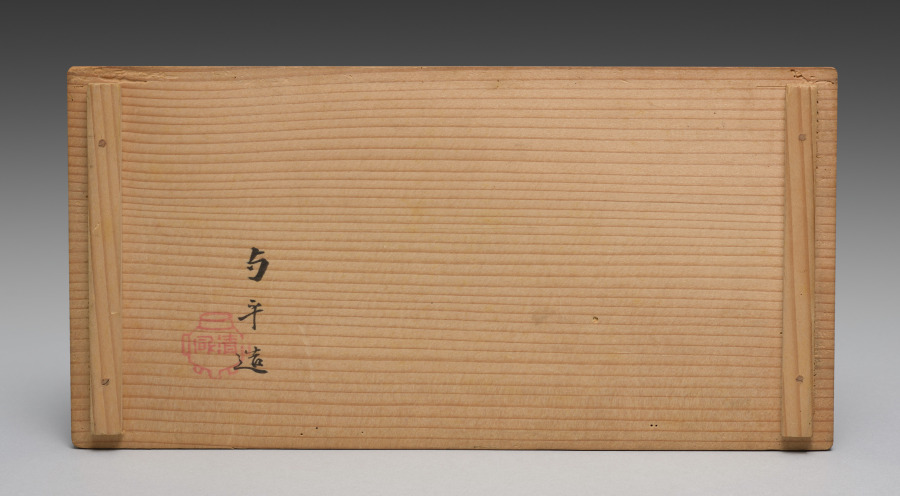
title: Dining Set with Plum Blossoms and Cracked-Ice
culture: Japan, Edo period (1615–1868) to Meiji period (1868–1912)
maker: Seifū Yohei II (Japanese, 1844–1878)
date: 1875–78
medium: Porcelain with molded designs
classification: Ceramic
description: Each item in this set has a delicate low-relief design of flowering plum branches over scattered, intersecting lines meant to resemble the cracked-ice surface of a frozen body of water and is signed on the base in gold pigment. While Yohei II produced many fine works in underglaze blue, like those produced by Kiyomizu Shichibei, he also made works in quite different styles later in his career, from the early 1870 s. In 1873, he was appointed purveyor to the Industrial Center of Kyoto Prefecture, a designation associated with Kyoto’s efforts to reach an international market through the port of Kobe; and from 1875 until his death, he was involved in national-level projects to present Japanese ceramics across the world. It was during this period that Yohei III was apprenticed to Yohei II, and it has been suggested that this set may in fact be an early example of Yohei III’s work, which he signed with his teacher’s name. Decorated with flowers resembling Japanese textile motifs, the set calls to mind the design of Yohei II’s pair of vases with plum blossoms in the Victoria and Albert Museum. Here, the elaborate trees created for a formal public exhibition setting have been translated into the approachable blossoms of the genteel domestic environment. While the designs are consistent across the pieces, each raised flower petal and pistil and each incised line in the ice was done by hand, so the cups, bowls, and dishes are similar yet unique. The bottoms of two boxes once identified the set’s owner, but the information has been deliberately obscured with black ink. However, inscriptions still visible appear to indicate two occasions, once at the end of July 1886 , and once again in June 1916 , when parts of the set were requested from Hokura in Niigata Prefecture. The location corresponds to a neighborhood in the present-day city of Jōetsu. The surname Tsuji 辻 also appears on a paper tag affixed to one of the box cloths. Future research may possibly reveal more about their provenance. A vase by Yohei III in a private collection combines the formal grandeur of the Yohei II vases in the Victoria and Albert Museum with the gentler design of this dining set, placing flowering plum trees against soft, scalloped-edge clouds resembling those in golden screens.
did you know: The dining wares have a creamy white coloration that the four boxes containing them identify as Korean in style.